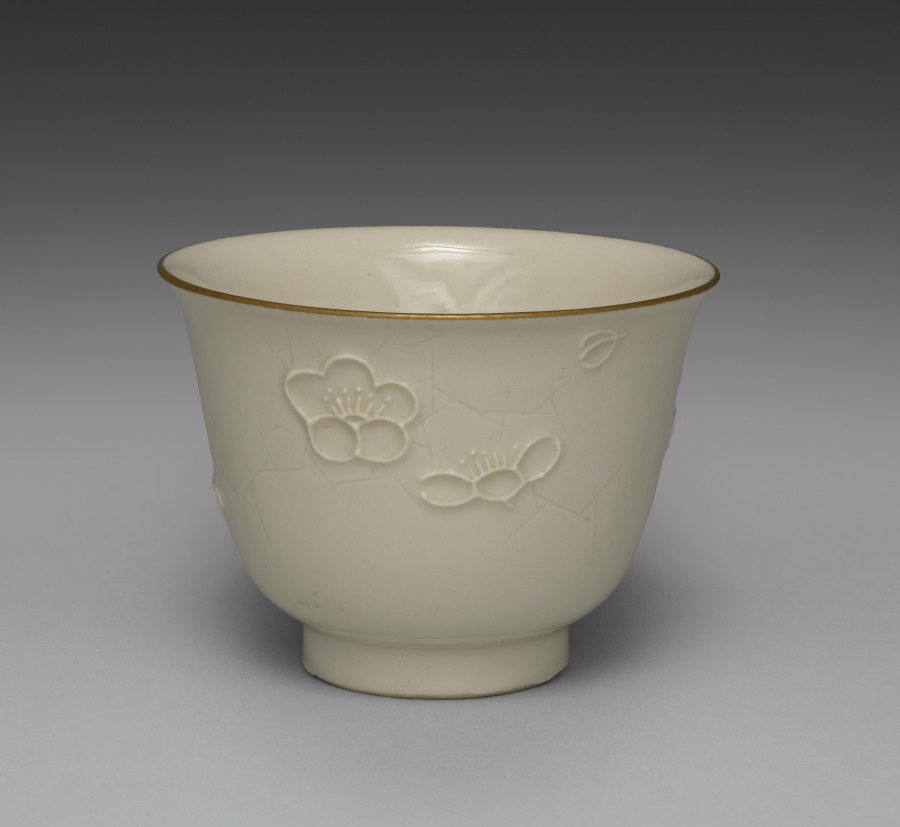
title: Drinking Cup from Dining Set with Plum Blossoms and Cracked-Ice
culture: Japan, Meiji period (1868–1912)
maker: Seifū Yohei II (Japanese, 1844–1878)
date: c. 1875–78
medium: Porcelain with molded designs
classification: Ceramic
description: Each item in this set has a delicate low-relief design of flowering plum branches over scattered, intersecting lines meant to resemble the cracked-ice surface of a frozen body of water and is signed on the base in gold pigment. While Yohei II produced many fine works in underglaze blue, like those produced by Kiyomizu Shichibei, he also made works in quite different styles later in his career, from the early 1870 s. In 1873, he was appointed purveyor to the Industrial Center of Kyoto Prefecture, a designation associated with Kyoto’s efforts to reach an international market through the port of Kobe; and from 1875 until his death, he was involved in national-level projects to present Japanese ceramics across the world. It was during this period that Yohei III was apprenticed to Yohei II, and it has been suggested that this set may in fact be an early example of Yohei III’s work, which he signed with his teacher’s name. Decorated with flowers resembling Japanese textile motifs, the set calls to mind the design of Yohei II’s pair of vases with plum blossoms in the Victoria and Albert Museum. Here, the elaborate trees created for a formal public exhibition setting have been translated into the approachable blossoms of the genteel domestic environment. While the designs are consistent across the pieces, each raised flower petal and pistil and each incised line in the ice was done by hand, so the cups, bowls, and dishes are similar yet unique. The bottoms of two boxes once identified the set’s owner, but the information has been deliberately obscured with black ink. However, inscriptions still visible appear to indicate two occasions, once at the end of July 1886 , and once again in June 1916 , when parts of the set were requested from Hokura in Niigata Prefecture. The location corresponds to a neighborhood in the present-day city of Jōetsu. The surname Tsuji 辻 also appears on a paper tag affixed to one of the box cloths. Future research may possibly reveal more about their provenance. A vase by Yohei III in a private collection combines the formal grandeur of the Yohei II vases in the Victoria and Albert Museum with the gentler design of this dining set, placing flowering plum trees against soft, scalloped-edge clouds resembling those in golden screens.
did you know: The dining wares have a creamy white coloration that the four boxes containing them identify as Korean in style.